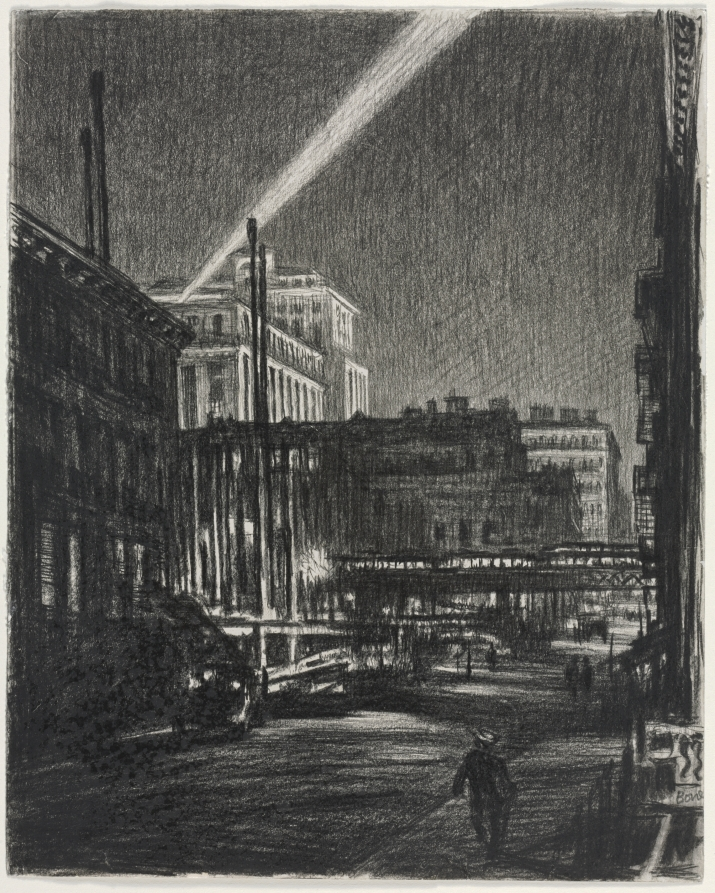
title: New York Night (recto)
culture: England, 20th century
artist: Muirhead Bone (British, 1876–1953)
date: c. 1920–40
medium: charcoal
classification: Drawing